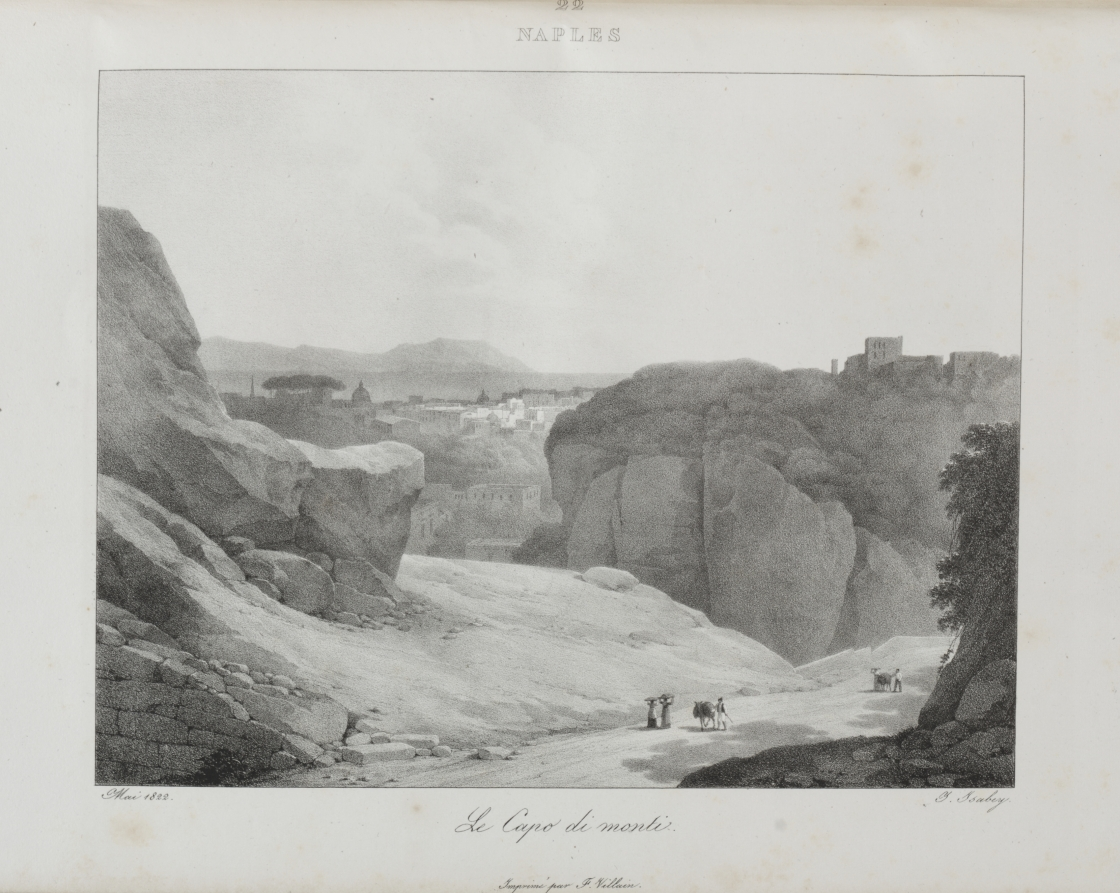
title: Voyage en Italie en 1822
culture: France, 19th century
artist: Jean-Baptiste Isabey (French, 1767–1855)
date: 1833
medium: lithograph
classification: Bound Volume